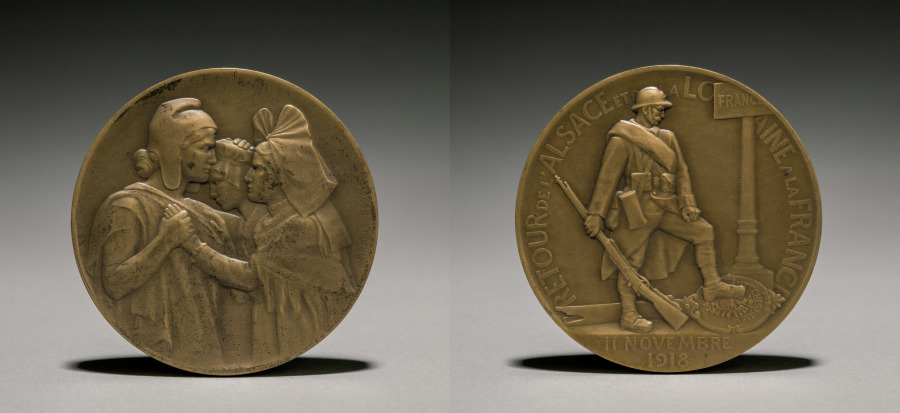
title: Medal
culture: France, 20th century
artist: Paul Roger-Bloche (French)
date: 1900s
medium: bronze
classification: Metalwork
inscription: obverse - "Retour del 'Alsace et de la Lorraine à la France. 11 Novembre 1918."